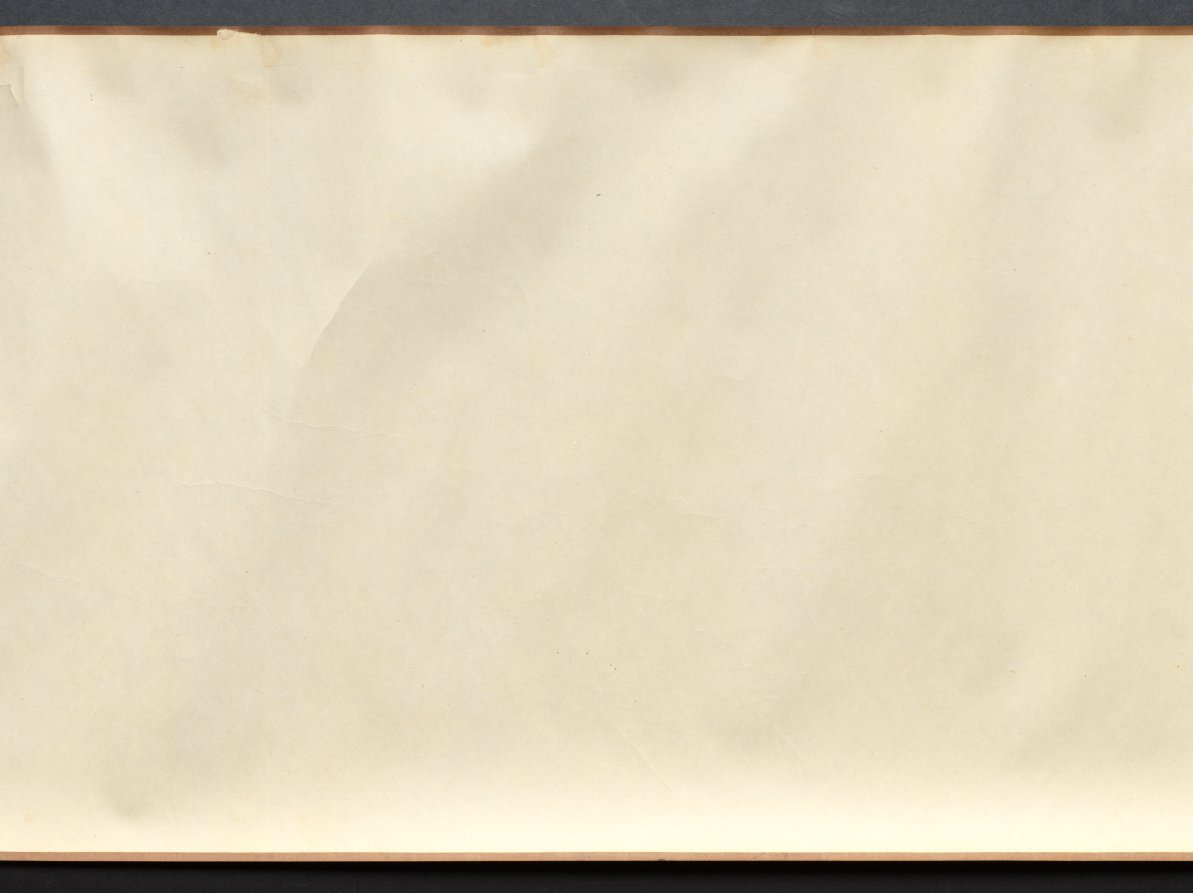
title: Returning to the Village in a Rainstorm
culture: China, Ming dynasty (1368–1644)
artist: Xie Shichen (Chinese, 1487–after 1567)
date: 1530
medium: Handscroll; ink and light color on silk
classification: Painting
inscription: 風雨歸村圖 嘉靖庚寅秋日樗仙謝時臣. [印] 謝時臣印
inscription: 3 additional seals unidentified.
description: This scroll depicts a wind- and rainswept landscape with figures in the countryside struggling against a late summer monsoon rainstorm. Such weather was familiar to residents of the lower Yangzi delta. Xie Shichen spent most of his life in the Suzhou area. Details of his career are scant, but his surviving works suggest that he made his living as a professional painter. This painting conveys drama and anecdotal observations, characteristic of Zhe school paintings, such as the one by Lü Wenying, CMA 1970.76.